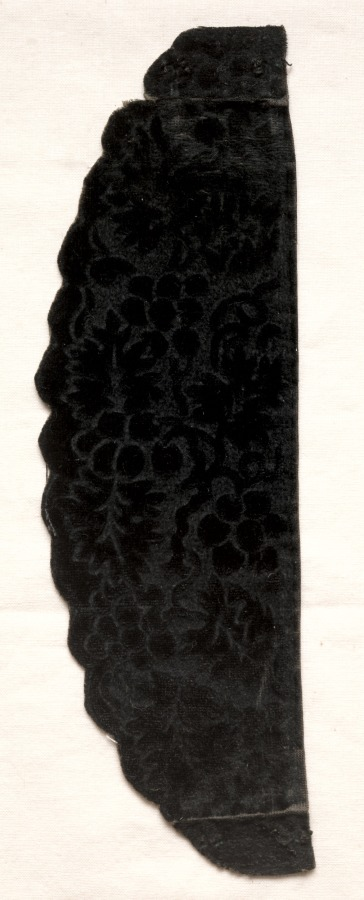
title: Velvet Cuffs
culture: France, 19th century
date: 1800s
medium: velvet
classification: Velvet